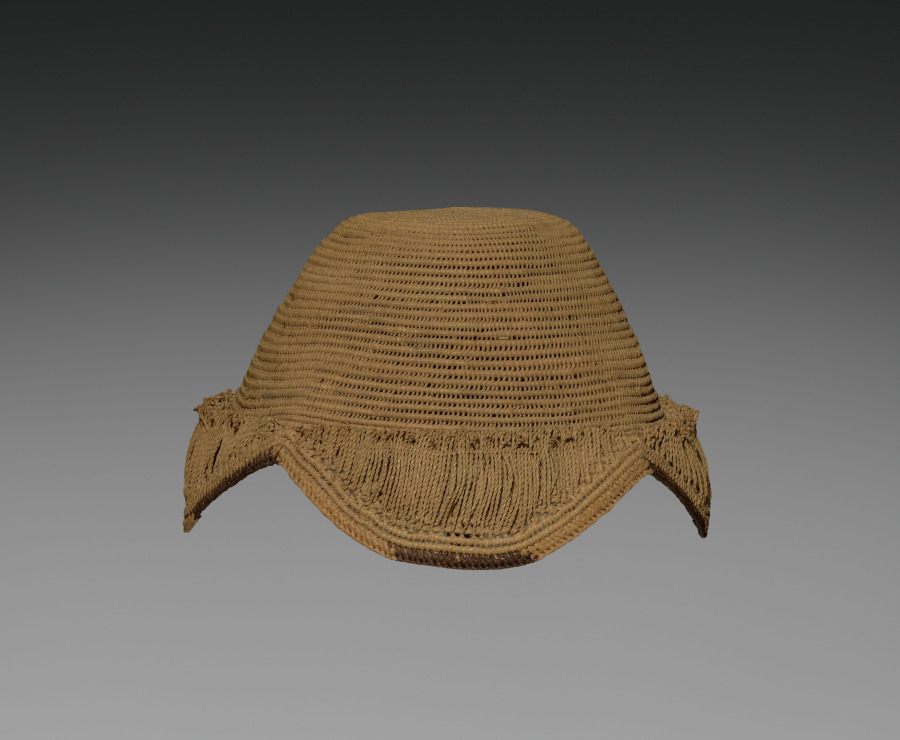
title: Hat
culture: Africa, Central Africa, Democratic Republic of the Congo, Kuba-style maker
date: early 1900s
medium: Raffia and dye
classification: Garment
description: Titled Kuba men and prominent women wear the laket, a small ornate dome-shaped hat. An essential fashion item of adult men in good social standing, it focuses special attention on the head as a significant marker of individual identity, ethnic affiliation, status, and role in society. This prestige object is secured on the crown of the head with a nine-and-a-half-inch metal pin that pierces through the hat onto a clump of hair. The laket is made from undyed raffia palm fiber that was then coiled into threads and woven. There are two examples of the laket: the plain type with the flat top, and the more elaborate type called the laket mishiing.